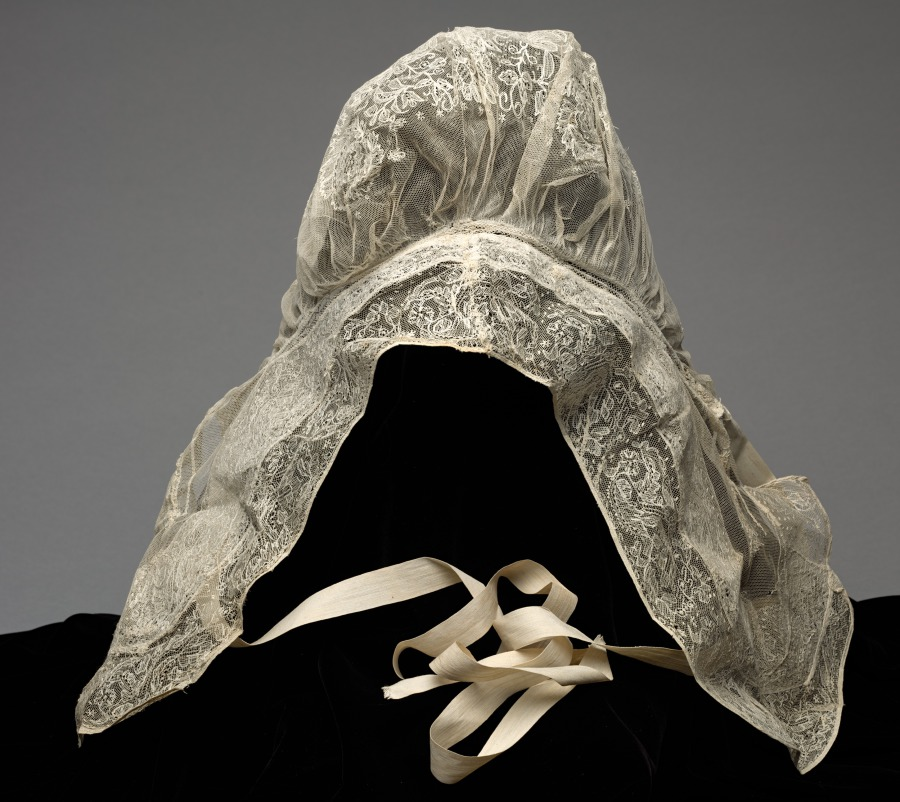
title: Lace Cap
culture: Netherlands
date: 1700s–early 1800s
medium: Lace net with embroidery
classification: Garment